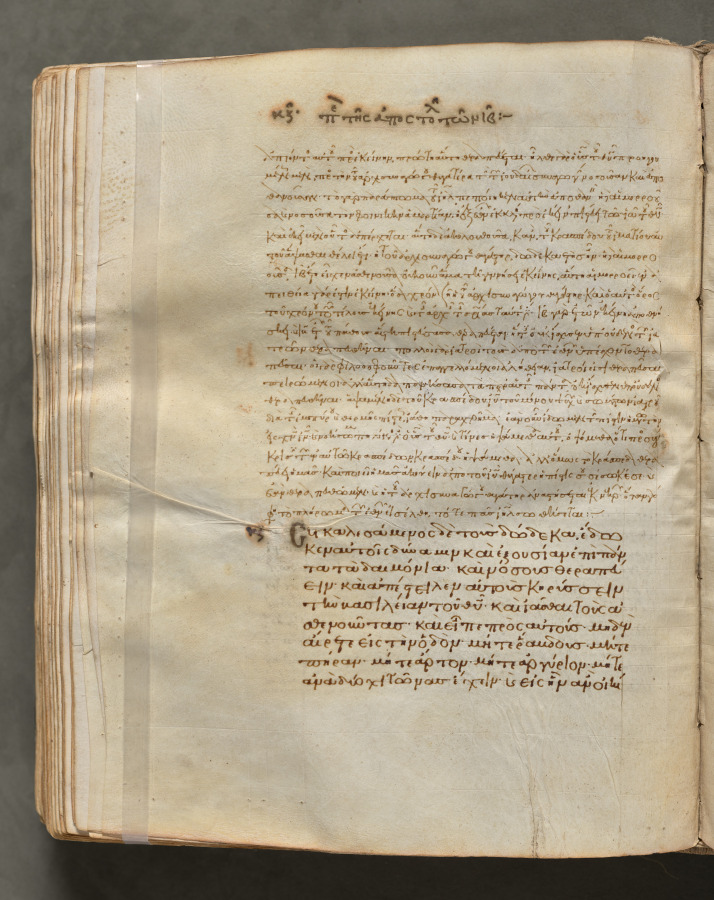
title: Text, folio 244 (verso), from a Gospel Book with Commentaries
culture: Byzantium, Constantinople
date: c. 1000–1100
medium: ink, tempera, and gold on vellum; leather binding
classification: Bound Volume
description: Each of the four gospels in this book opens on a page with brilliantly illuminated borders depicting the author of the text as well as birds—principally peacocks, symbols of the immortality of the soul—and fountains, representing the fountain of life and the salvation of the soul. This volume consists of 428 leaves with texts in Greek. Its level of sophistication suggests that it was probably written and decorated in a monastery in Constantinople.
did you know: Gospel books were carried in procession through Byzantine churches.